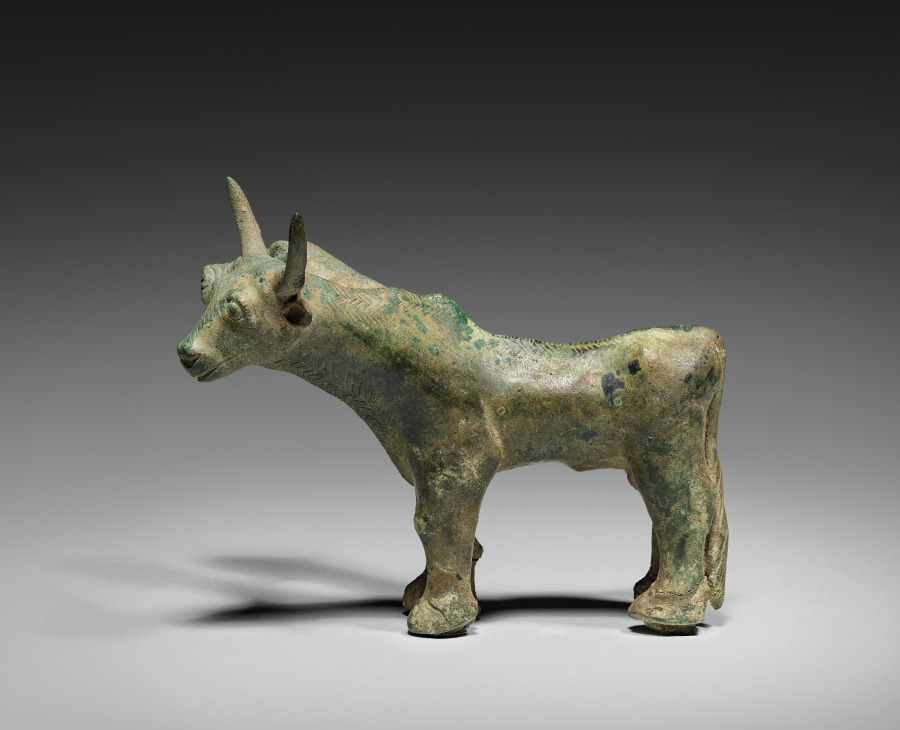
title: Composite Lion and Bull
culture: Iran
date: 1500–1000 BCE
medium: bronze, cast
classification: Sculpture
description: Combining the strength of the lion and the fertility of the bull, this creature must have served as an object of worship in a temple or shrine.